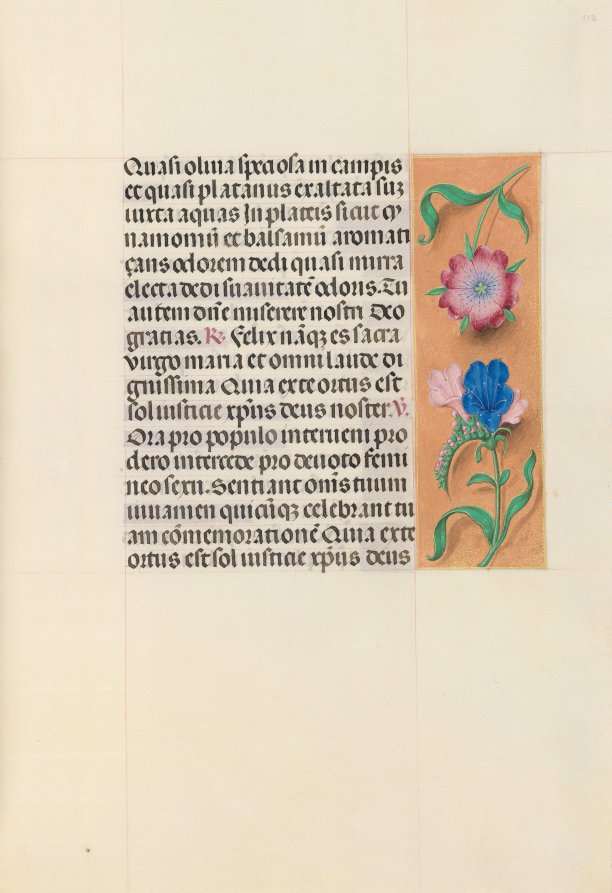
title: Hours of Queen Isabella the Catholic, Queen of Spain: Fol. 112r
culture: Flanders, Ghent and Bruges, late 15th century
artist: Master of the First Prayerbook of Maximillian (Flemish, c. 1444–1519)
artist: and Associates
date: c. 1500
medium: ink, tempera, and gold on vellum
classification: Bound Volume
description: This manuscript was illuminated by a circle of at least five highly organized manuscript painters active in the Flemish cities of Ghent and Bruges. The principal illuminator was Alexander Bening, who painted the majority of the book's miniatures. Manuscripts produced by this circle of artists are renowned for the decoration of their borders, which typically feature a rich variety of realistically-painted flowers, birds, and butterflies. This prayer book, called a book of hours, was intended not for a cleric, but for the private devotions of a lay person-in this case, Isabella the Catholic, Queen of Spain (1451-1504). Isabella's coat of arms embellishes the book's frontispiece. It is unlikely that the book was commissioned by the Queen herself; rather, she probably received it as a diplomatic gift from someone courting her patronage, perhaps Cardinal Francisco Jimenez de Cisneros. A Franciscan friar, Jimenez was dependent upon Isabella for his advancement, first to the post of Queen's confessor in 1492, and then to Archbishop of Toledo in 1495.